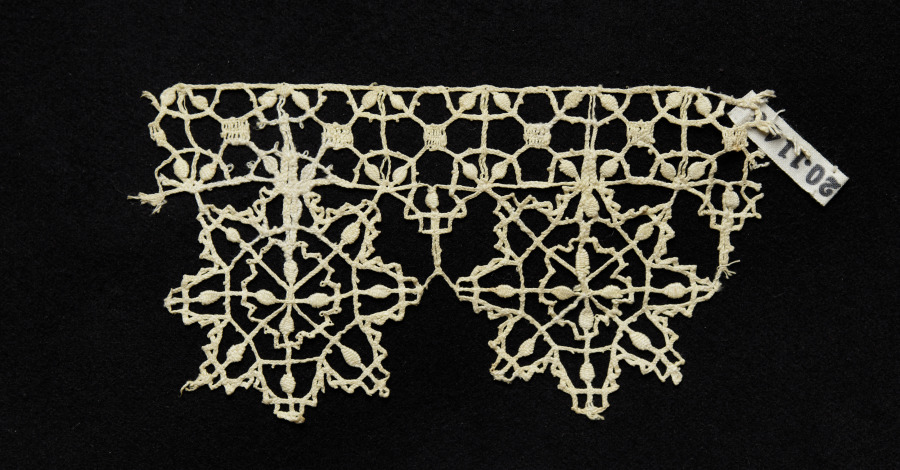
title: Lace Edging of Star Points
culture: Italy, Genoa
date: 1550–99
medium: Bobbin lace (needle lace, reticella design)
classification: Lace